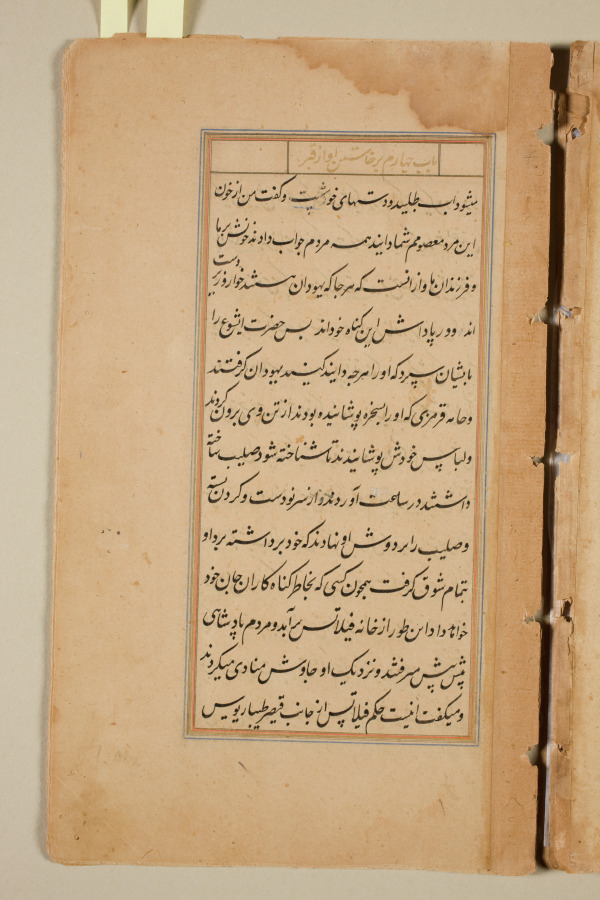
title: Text page from a Mirror of Holiness (Mir’at al-quds) of Father Jerome Xavier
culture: Mughal India, Allahabad, made for Prince Salim (1569–1627)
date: 1602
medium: Ink and gold on paper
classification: Manuscript